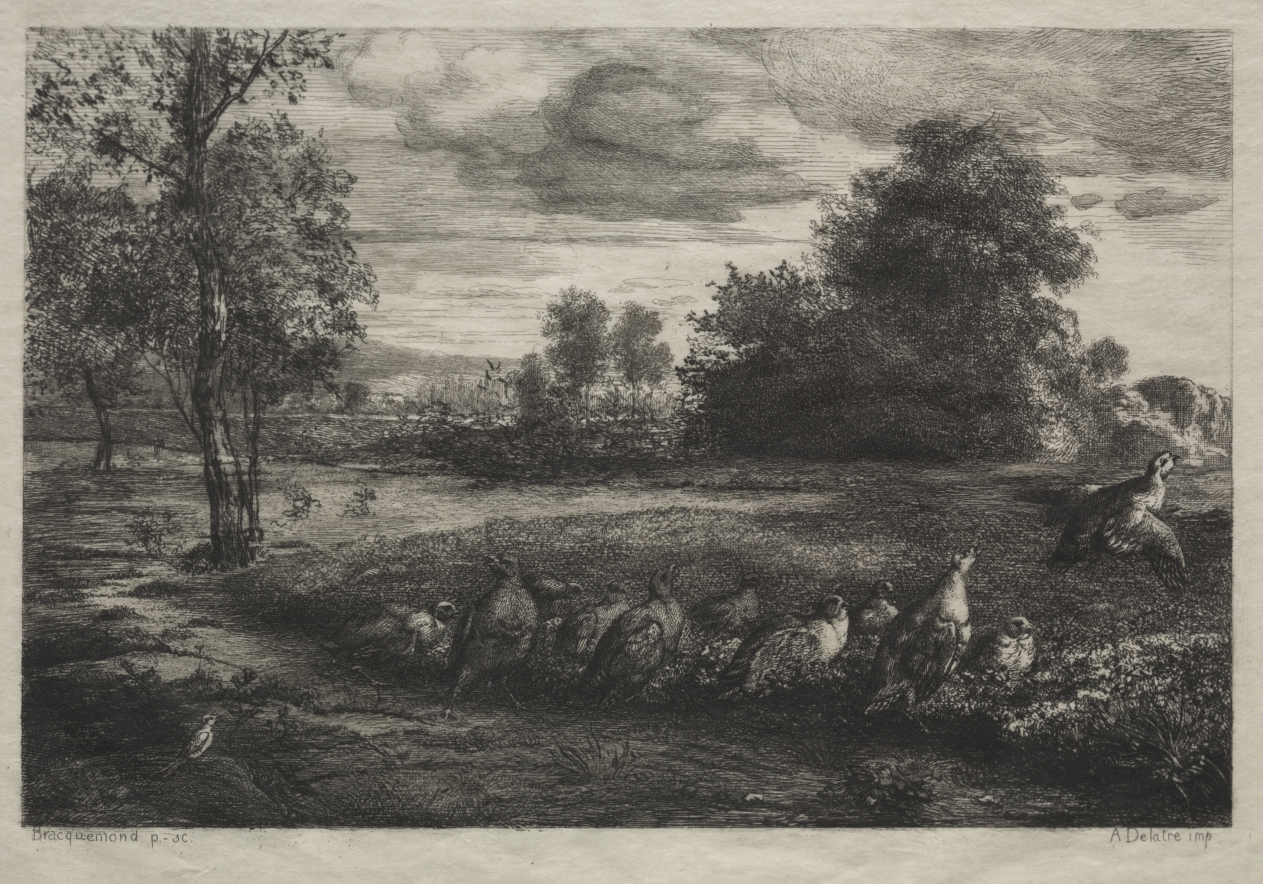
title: The Call to Order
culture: France, 19th-20th Century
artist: Félix Bracquemond (French, 1833–1914)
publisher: August Delâtre (French, 1822–1907)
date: 1859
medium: etching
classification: Print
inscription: printed, lower left: Bracquemond p.-sc.; printed, lower right: A. Delatre imp.